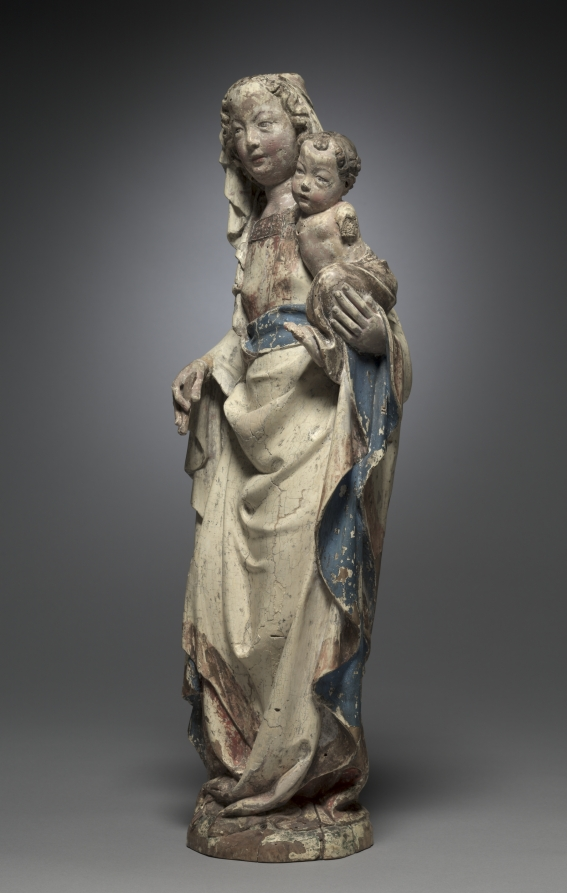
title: Virgin and Child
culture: Austria, Diocese of Passau, 14th century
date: c. 1370–1380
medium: painted lindenwood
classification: Sculpture